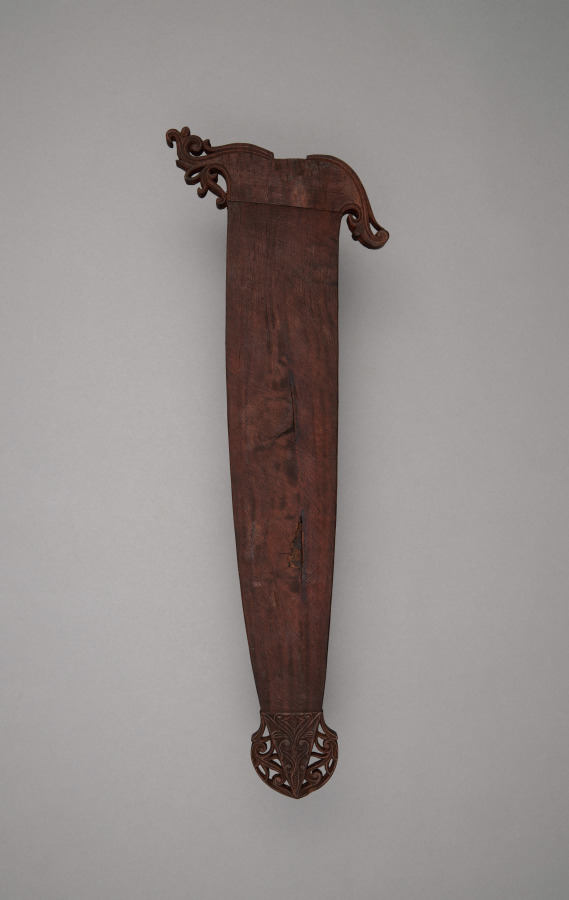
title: Scabbard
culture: Philippines, Mindanao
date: 1800s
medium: Wood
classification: Arms and Armor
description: This wooden scabbard was produced to house a barong blade, probably for a Maranao or Tausug community. It was carved from a single piece of hardwood, tapering toward the tip and widening slightly at the mouth. The upper section features scrolling okir motifs, while the rounded tip is decorated with finely pierced okir carving, forming a lacelike pattern characteristic of the Islamic groups of the southern Philippines.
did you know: The two halves of this scabbard are glued—instead of lashed—together.